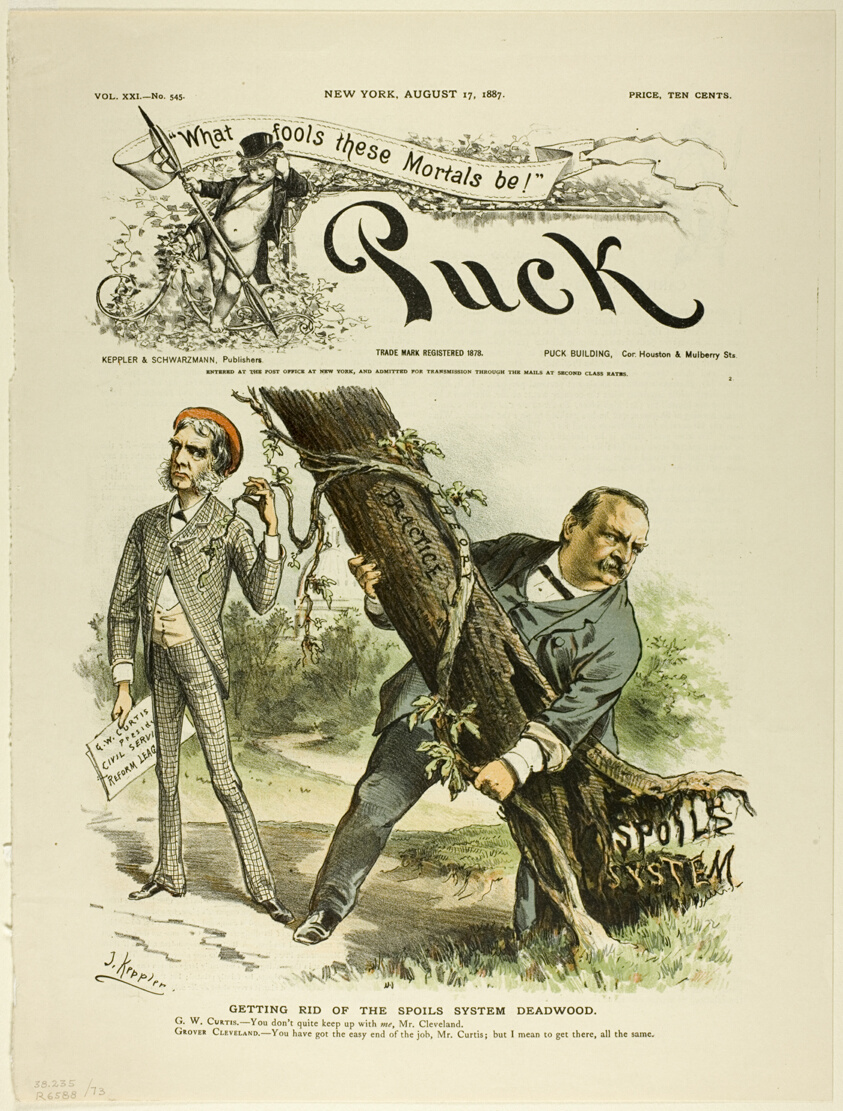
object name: Print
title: Getting Rid of the Spoils System Deadwood, from Puck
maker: Joseph Keppler (American, 1638-1894)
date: published August 17, 1887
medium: Color lithograph on newsprint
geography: United States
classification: lithograph; print; prints and drawing